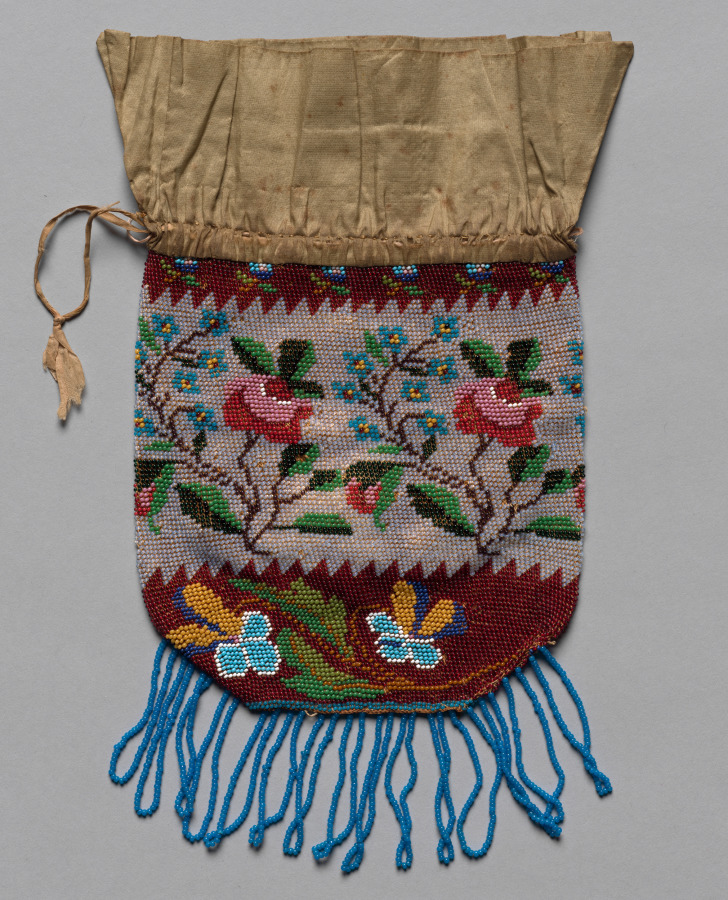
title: Beaded Bag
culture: America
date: 19th century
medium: beads and silk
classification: Garment